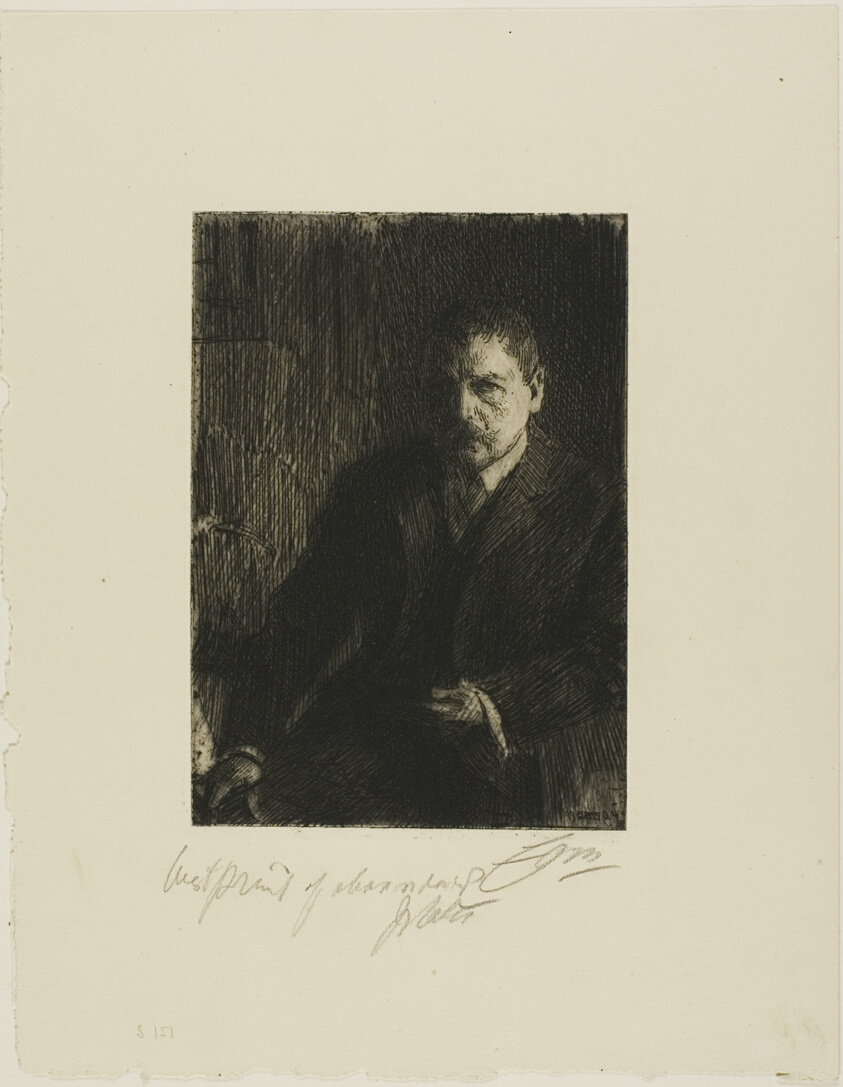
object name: Print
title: Self-Portrait 1904 I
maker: Anders Zorn (Swedish, 1860-1920)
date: 1904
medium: Etching on ivory laid paper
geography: Sweden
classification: etching; print; prints and drawing